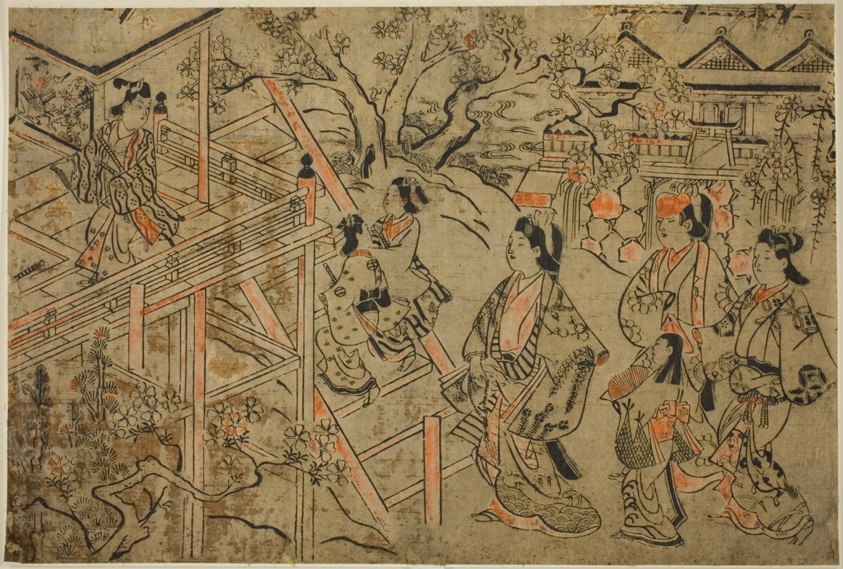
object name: Print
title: Visiting Kiyomizu Temple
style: Japanese (culture or style)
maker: Sugimura Jihei (Japanese, active c. 1681-1698)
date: c. 1684/98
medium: Hand-colored woodblock print; o-oban, tan-e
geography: Japan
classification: woodblock print; print; asian art